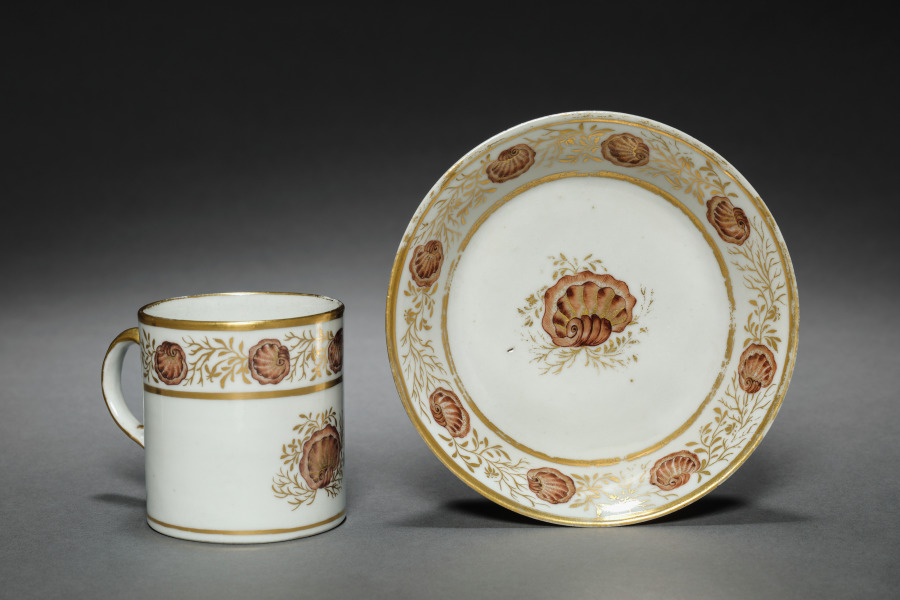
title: Cup and Saucer from Oliver Wolcott, Jr. Tea Service (4 of 6)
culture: Chinese Export porcelain, late 18th-early 19th century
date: 1785–1805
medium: porcelain, sepia enamel, gold leaf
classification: Ceramic